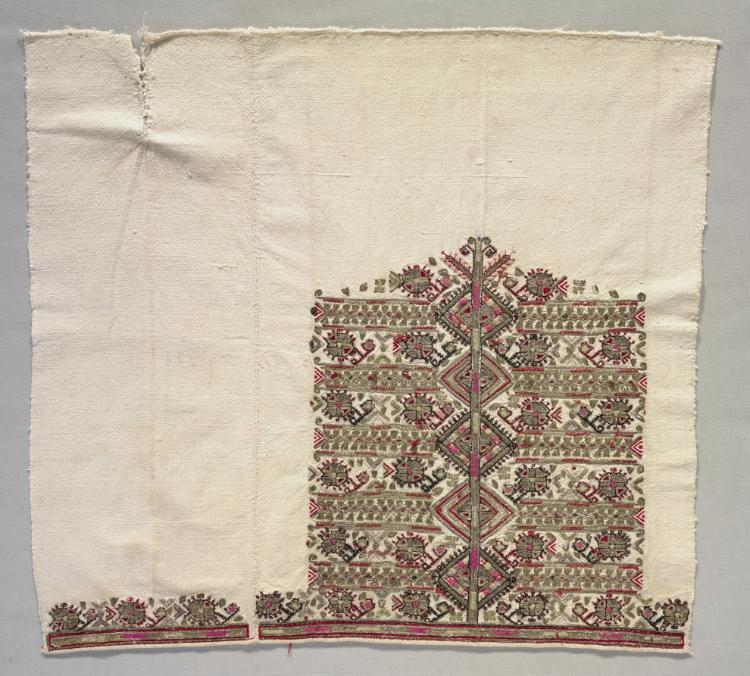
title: Embroidered Sleeves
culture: Yugoslavia, Kosovo, 18th-19th century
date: 18th-19th century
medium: embroidery: wool, silver thread and sequins on plain weave linen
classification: Embroidery